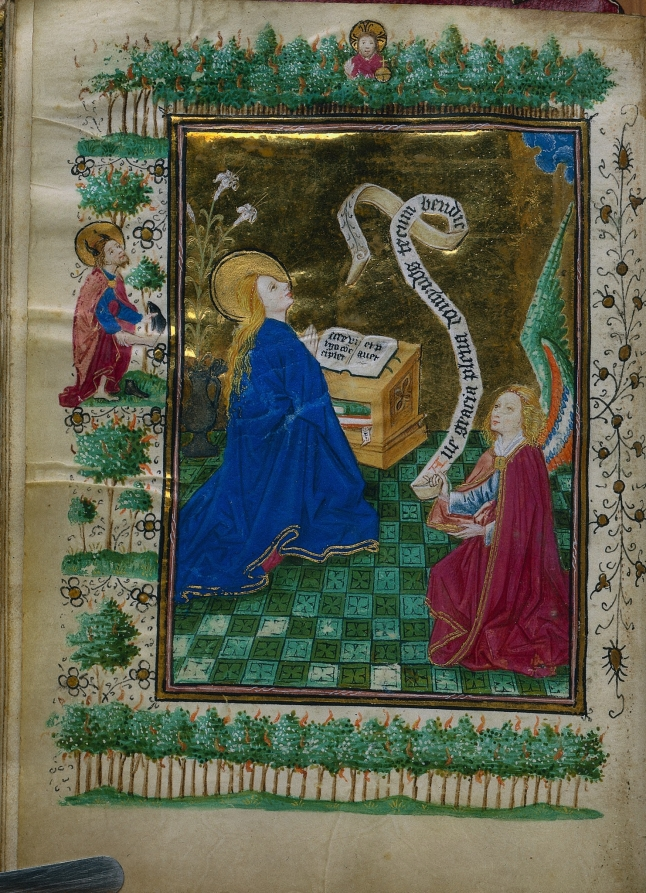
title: Book of Hours (Use of Utrecht)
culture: Netherlands, Utrecht, 15th century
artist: Master of Gijsbrecht van Brederode (Netherlandish)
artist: Master of the Boston City of God (Netherlandish)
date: c. 1460–1465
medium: ink, tempera, and gold on vellum; binding: brown Morocco over original wooden boards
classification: Bound Volume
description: This manuscript is a collaborative effort of two talented illuminators with distinctive styles. Ninety-seven historiated initials (letters containing scenes) are by the Master of the Boston City of God, a painter who worked in Utrecht. Four full-page miniatures (small paintings), including the nativity, have recently been attributed to the Master of Gijsbrecht van Brederode. The background of the nativity depicts a distant cityscape (perhaps Utrecht), adjacent to which may be seen the journey of the magi and the annunciation to the shepherds. In the left margin, the Virgin Mary appears to Emperor Augustus and the Tiburtine Sibyl, who, according to legend, foretold the coming of Christ. Like all books of hours made for the use of Utrecht, this volume is not written in Latin, but in a Dutch littera textualis, an elegant Gothic book hand.